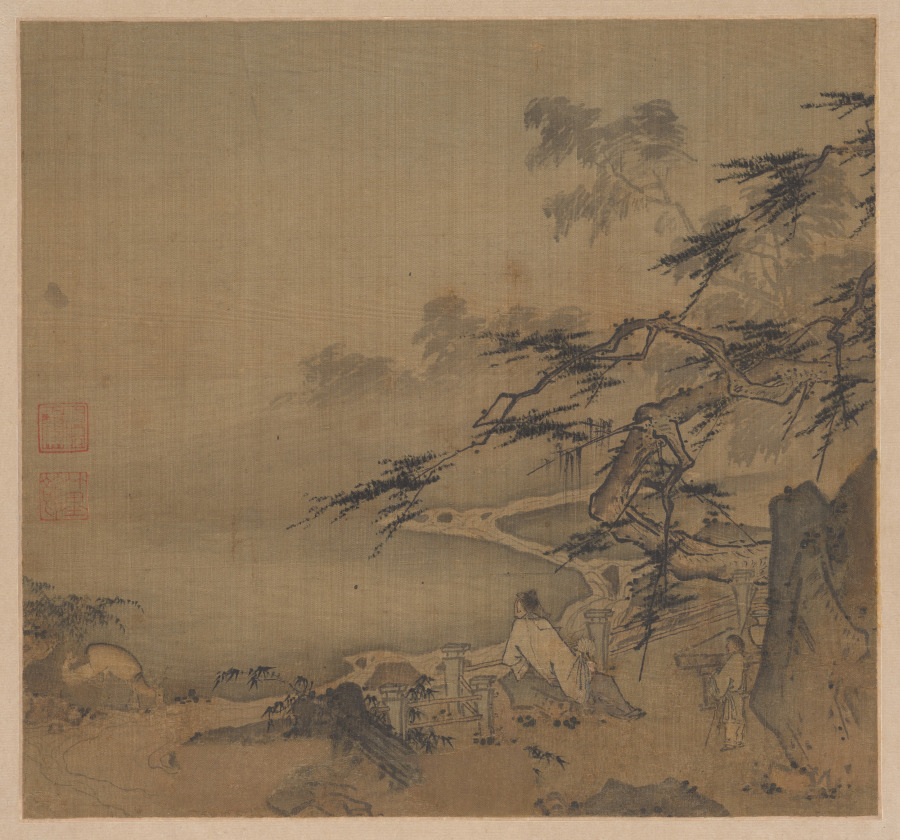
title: Watching the Deer by a Pine Shaded Stream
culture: China, Southern Song dynasty (1127-1279)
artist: Ma Yuan (Chinese, c. 1150–after 1255)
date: 1127–1279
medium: Album leaf; ink and light color on silk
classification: Painting